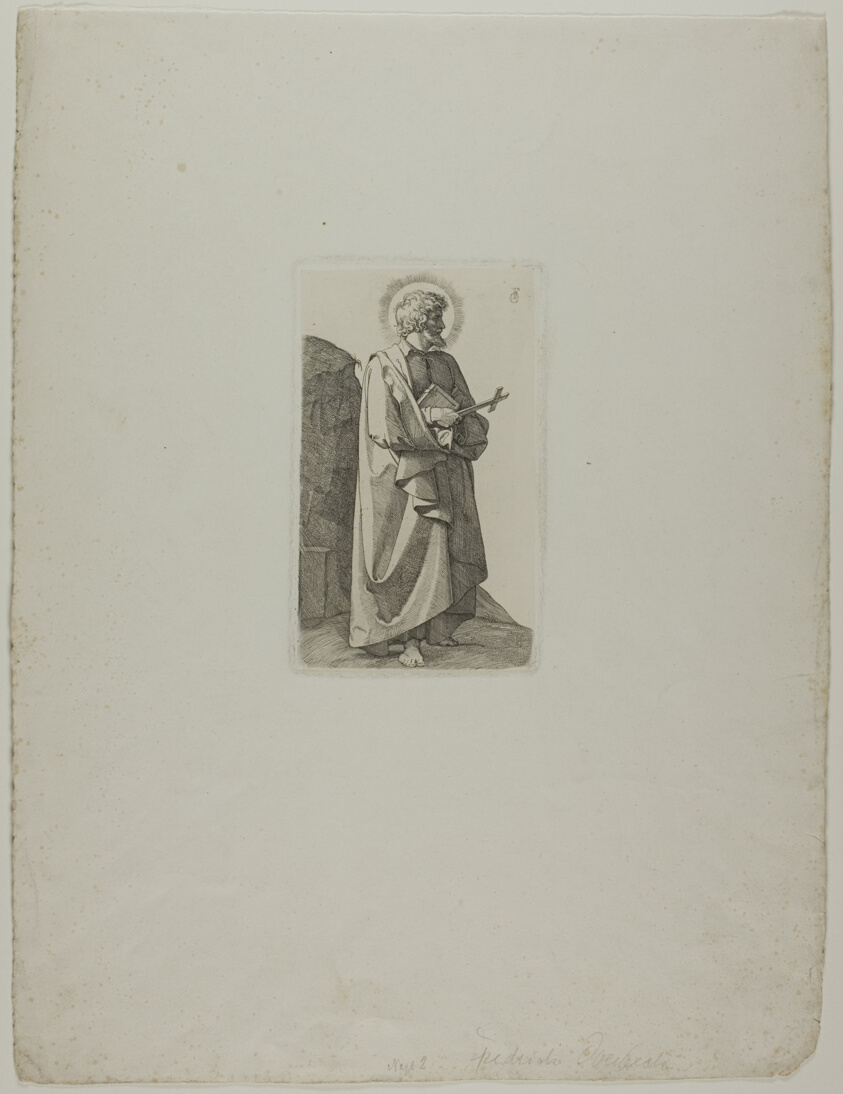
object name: Print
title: Saint Philipp Neri with Cross and Book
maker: Johann Friedrich Overbeck (German, 1789-1869)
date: 1826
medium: Etching on wove paper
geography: Germany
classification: etching; print; prints and drawing